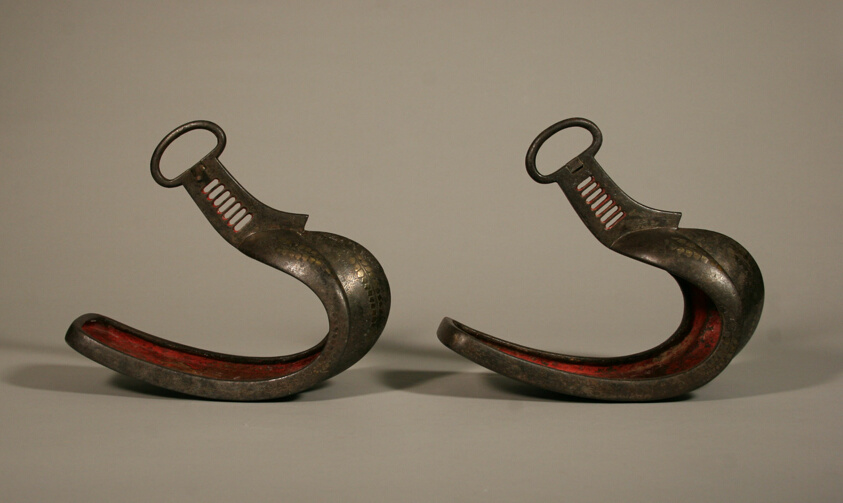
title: Pair of stirrups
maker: Artist unknown (Japanese)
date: 17th-18th century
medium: Silver and gold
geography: Japan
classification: bronze; metalwork; asian art